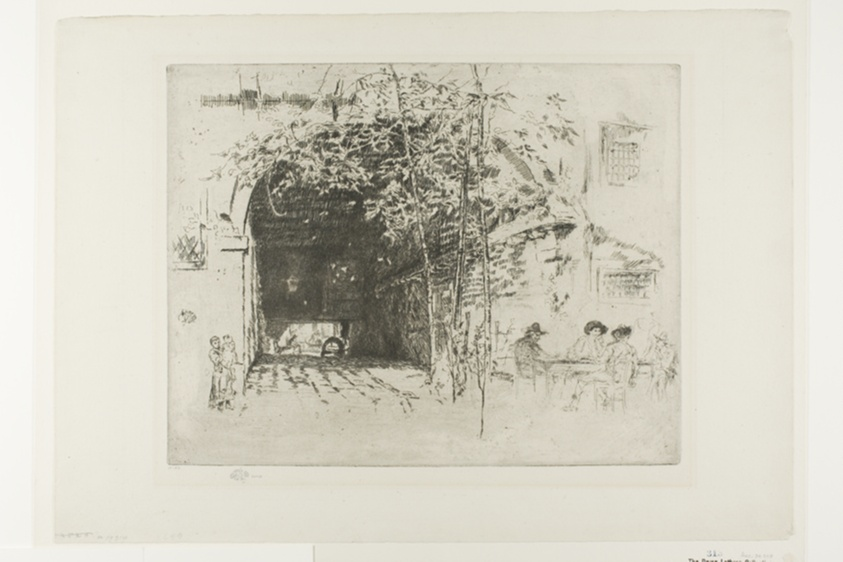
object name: Print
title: The Traghetto, No. 2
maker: James McNeill Whistler (American, 1834-1903)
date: 1880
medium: Etching and drypoint with foul biting in black ink on ivory laid paper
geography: United States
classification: etching; foul biting; print; prints and drawing; paper; drypoint